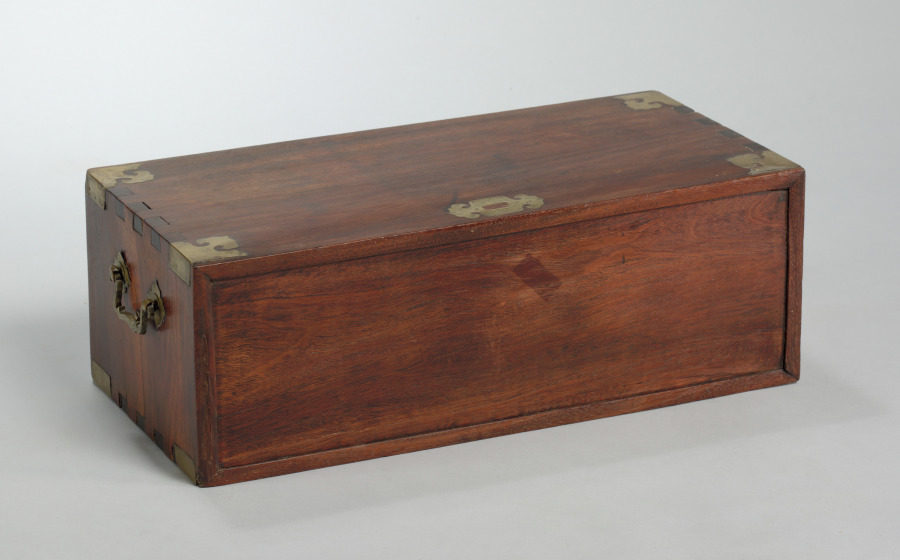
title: Small Oblong Two-Drawer Chest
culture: China, Qing dynasty (1644-1911)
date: 1800s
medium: Chicken-wing wood (jichimu)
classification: Furniture and woodwork